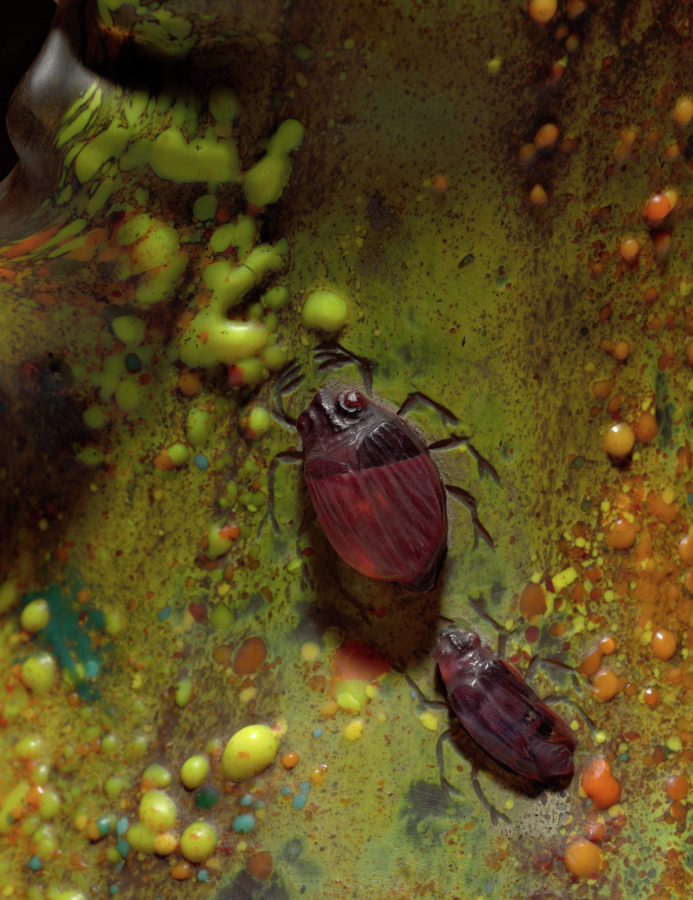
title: Vase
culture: France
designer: Daum Frères (French, founded 1875)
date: c. 1910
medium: Blown, cast, and vitrified glass with applied, wheel-engraved decoration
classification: Glass